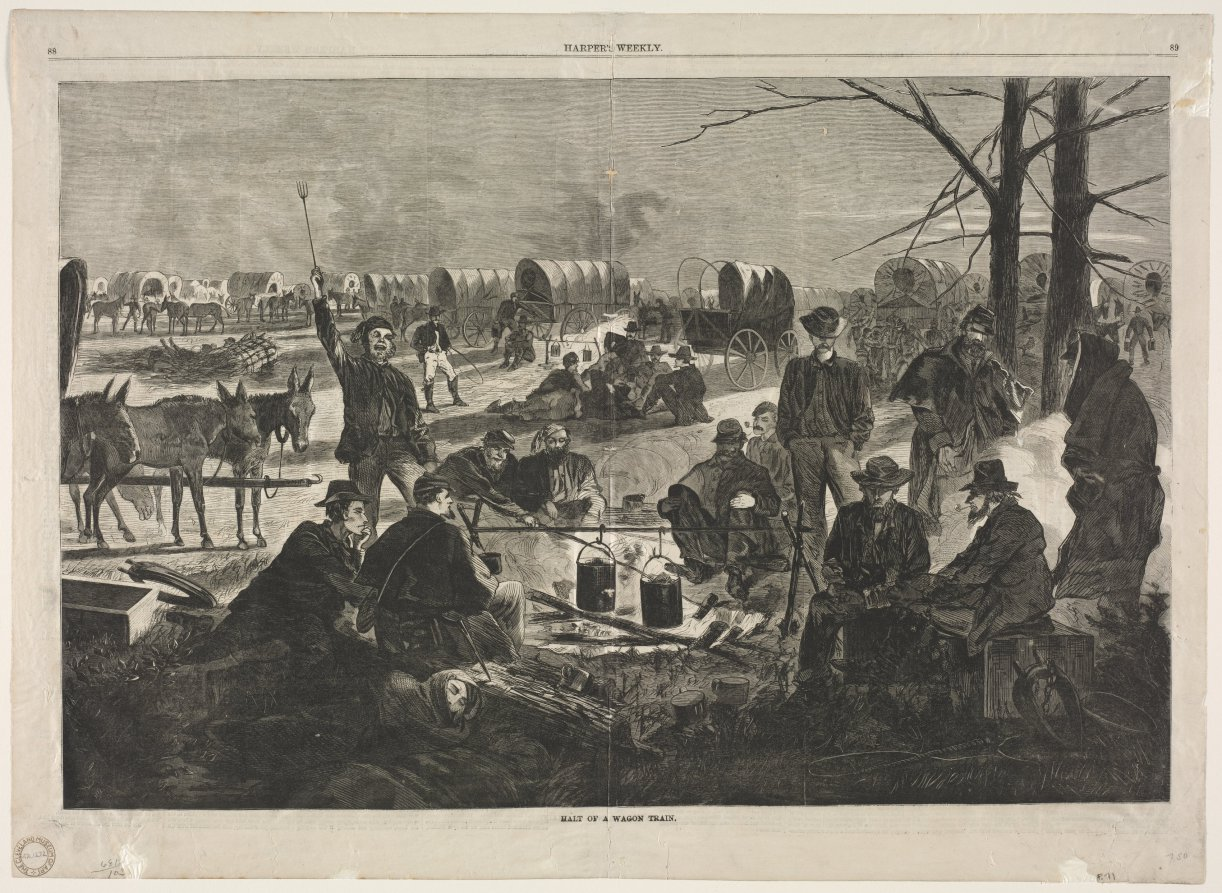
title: Halt of the Wagon Train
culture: America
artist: Winslow Homer (American, 1836–1910)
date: 1864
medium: wood engraving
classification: Print